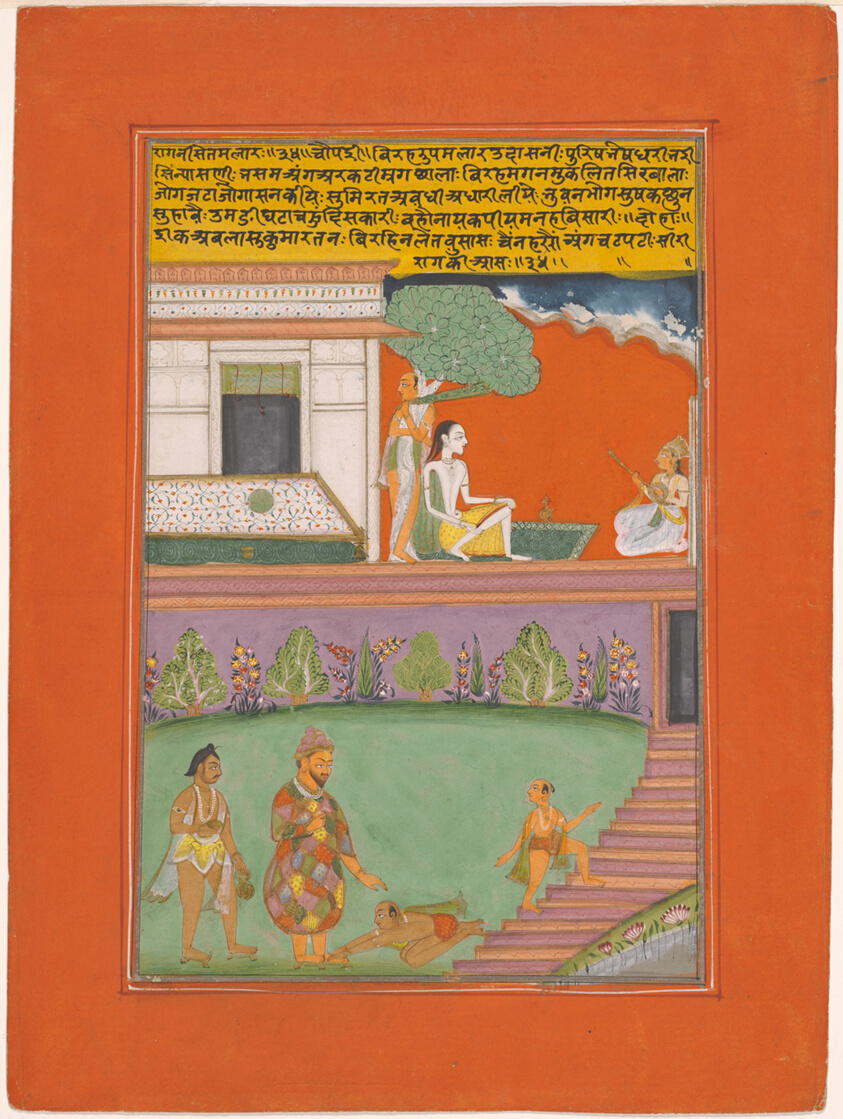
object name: Painting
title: Ragini Setmalar, Page from a Jaipur Ragamala Set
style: South Asian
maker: India; Rajasthan, Jaipur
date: c. 1750-1770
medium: Opaque watercolor and gold on paper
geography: Rajasthan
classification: miniature painting; painting; asian art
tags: music, musicians